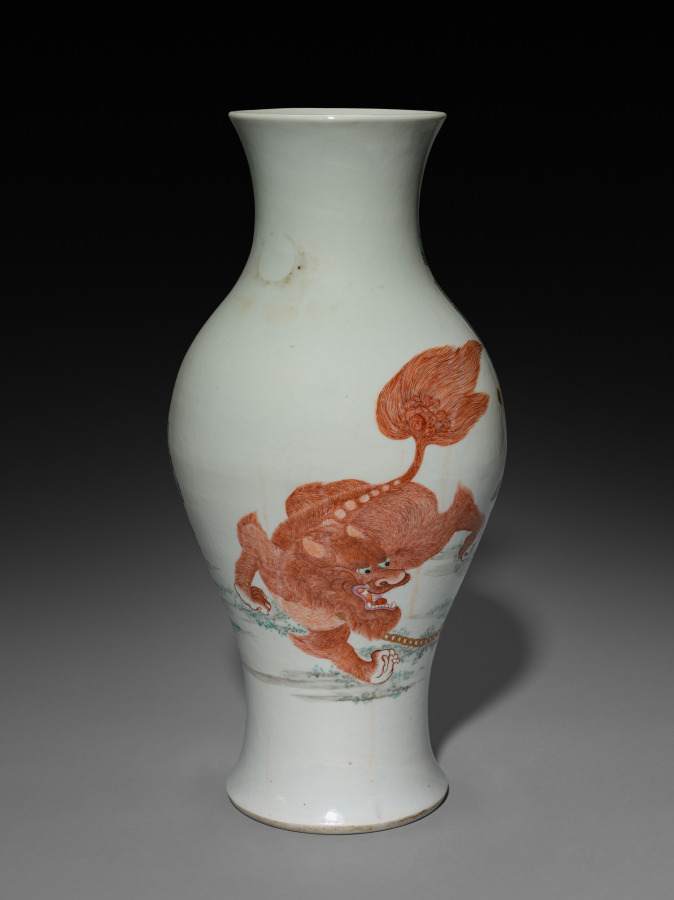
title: Vase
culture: China, Qing dynasty (1644–1911), Qianlong reign (1736–95)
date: 1736–95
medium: porcelain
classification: Ceramic